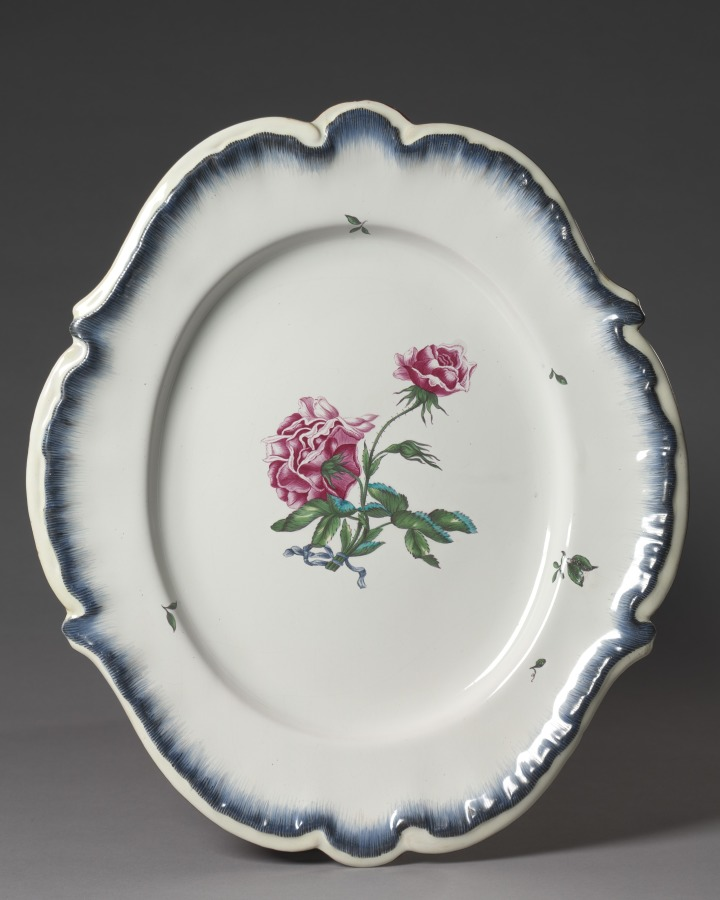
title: Stand for a Tureen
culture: France, Strasbourg, 18th century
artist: Paul Hannong Factory (French)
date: c. 1750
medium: tin-glazed earthenware (faience) with enamel decoration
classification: Ceramic